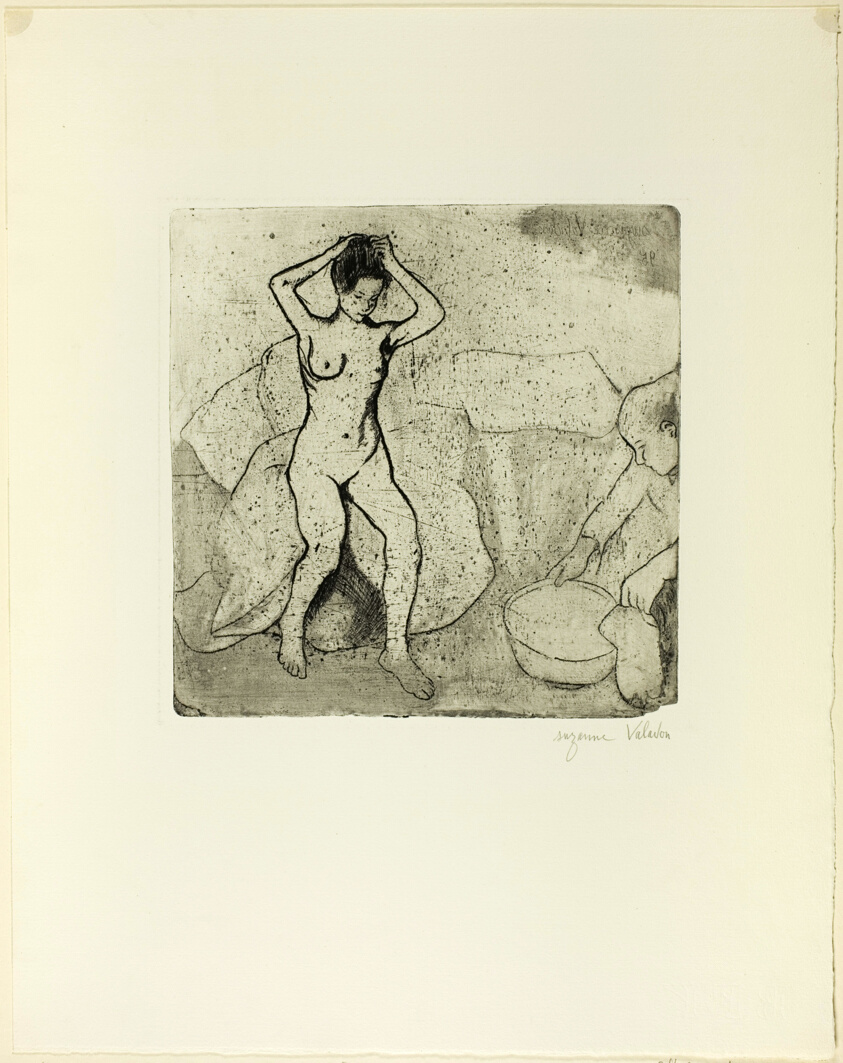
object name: Print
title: Catherine Prepares the Bath and Louise, Nude, Fixes her Hair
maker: Suzanne Valadon (French, 1865-1938)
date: 1895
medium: Soft ground etching with foul biting and drypoint in black on ivory wove paper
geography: France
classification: soft-ground etching; etching; print; prints and drawing